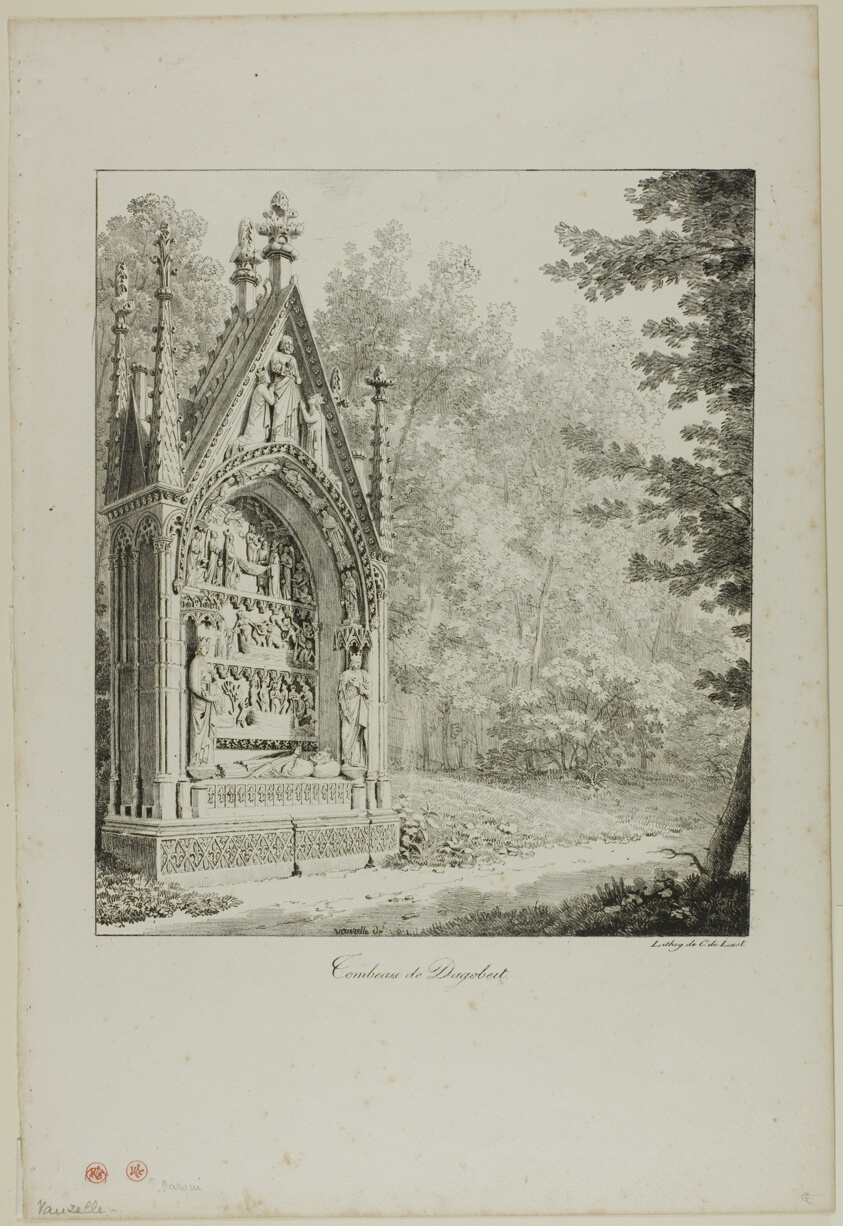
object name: Print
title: Tomb of Dagobert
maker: Jean Lubin Vauzelle (French, born 1776); printed by Comte de Charles Philibert Lasteyrie du Saillant (French, 1759-1849)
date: 1800/50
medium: Lithograph in black on ivory wove paper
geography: France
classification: lithograph; print; prints and drawing